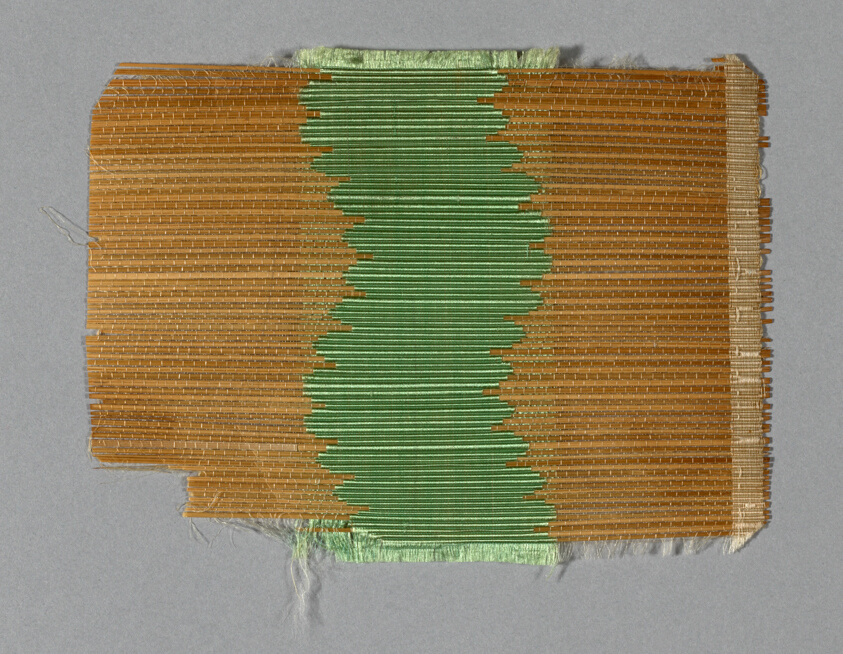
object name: Textile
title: Sample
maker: France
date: c. 1835/40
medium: Silk and straw, plain weave self-patterned by stripes of twill interlacing over plain interlacing; woven on loom with Jacquard attachment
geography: France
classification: textile; weaving